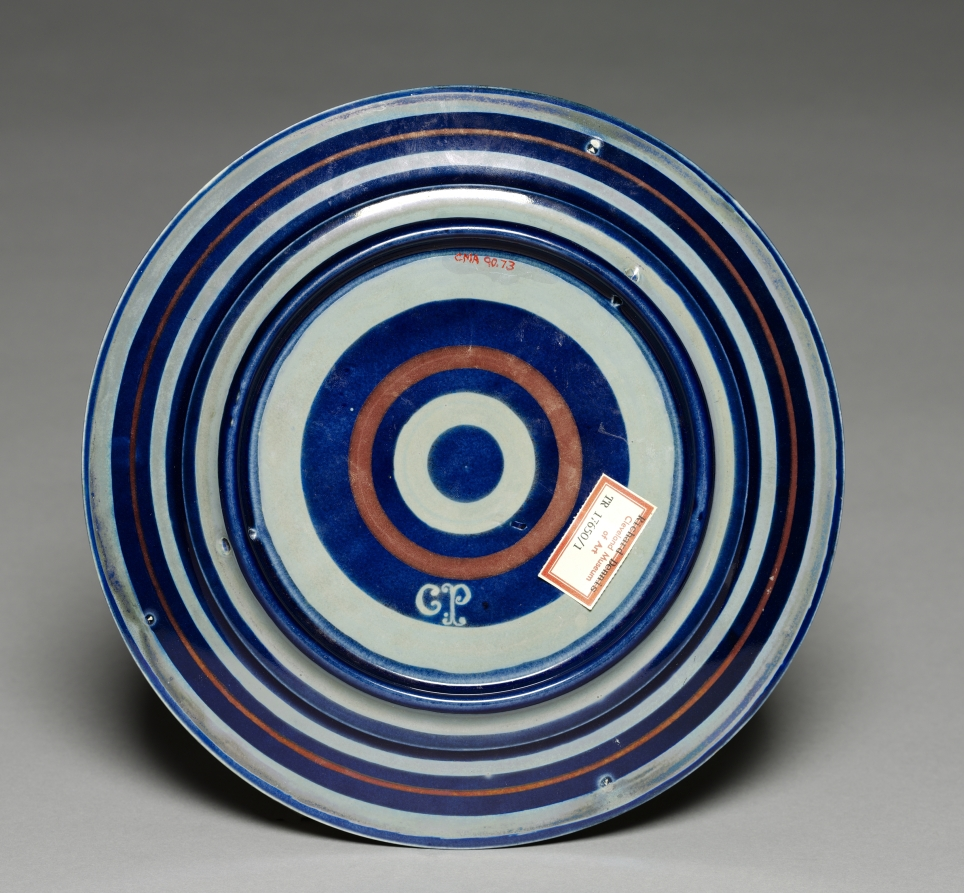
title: Dish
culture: England, 19th century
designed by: William Frend De Morgan (British, 1839–1917)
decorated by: Charles Passenger (British)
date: c. 1900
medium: ceramic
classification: Ceramic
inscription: signed on back: C.P.